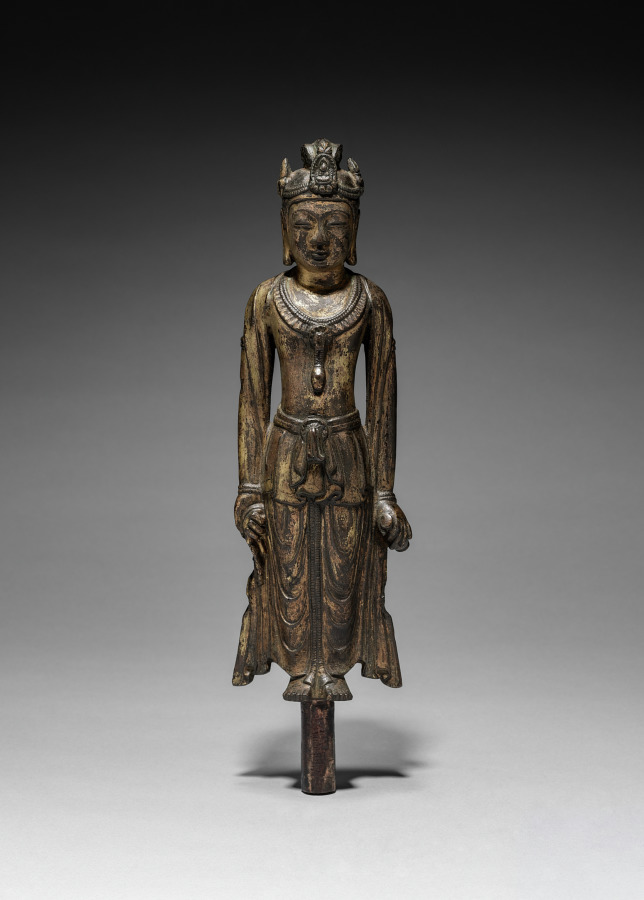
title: Kannon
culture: Japan, Asuka period (538–710)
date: mid-600s to early 700s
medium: gilt bronze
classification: Sculpture